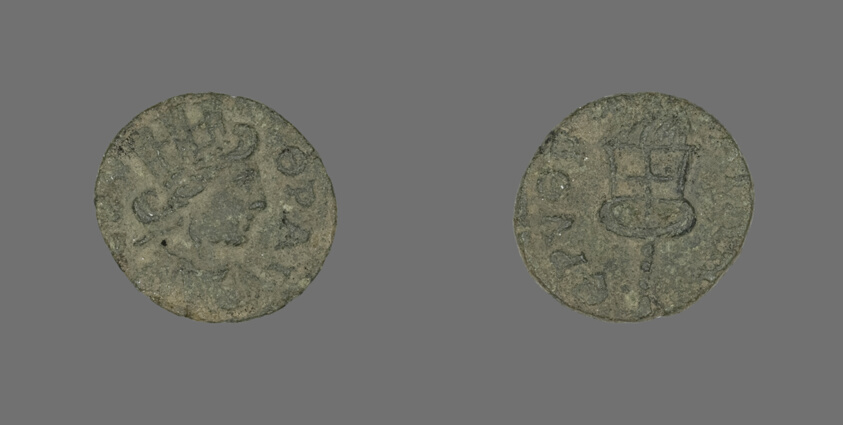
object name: Coin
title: Coin Depicting the Goddess Tyche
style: greek, ancient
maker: Greek, minted in Erythrae, Ionia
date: 3rd century BCE-4th century CE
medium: Bronze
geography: Ancient Greece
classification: coin; ancient art